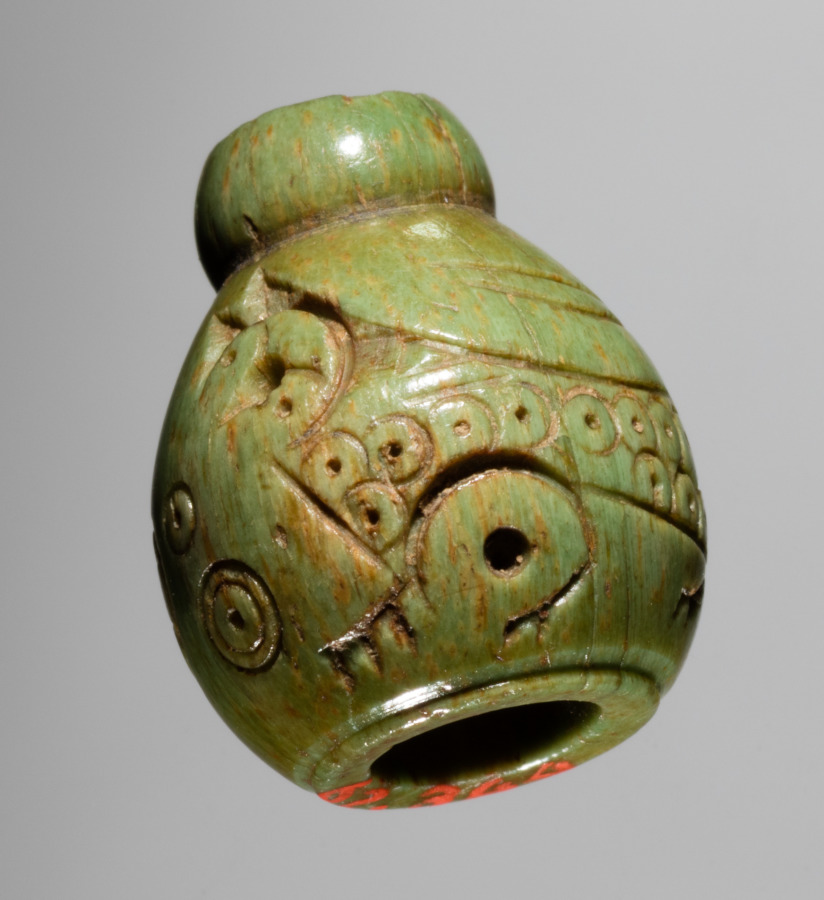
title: Spindle Whorl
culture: Iran, early Islamic period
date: 700s - 900s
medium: bone, incised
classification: Spindle Whorl